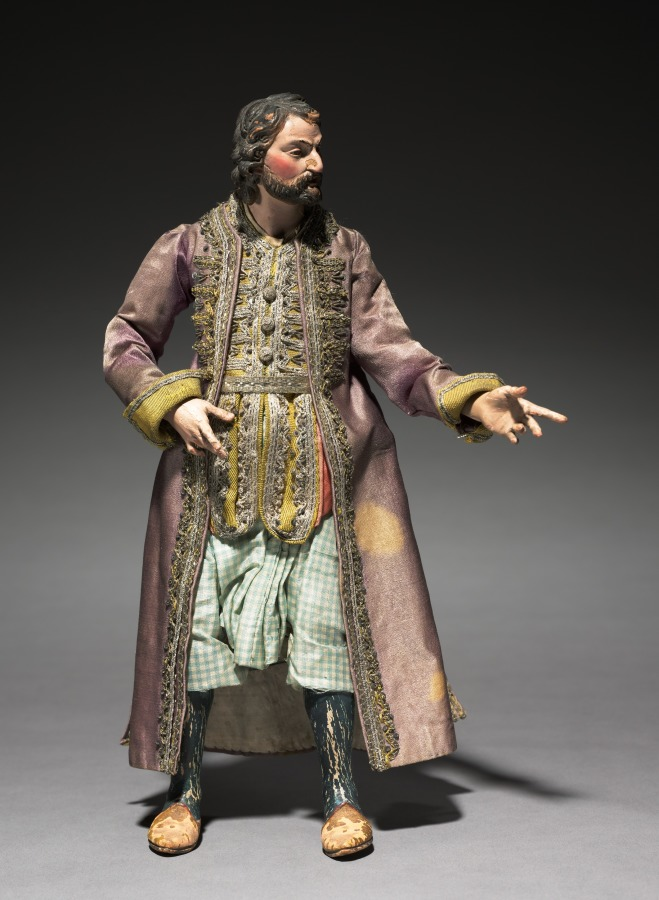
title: Figure from a Crèche: Standing Man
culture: Italy, Naples, late 18th-early 19th century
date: 1780–1830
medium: painted wood and terracotta with various textiles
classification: Sculpture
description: The practice of creating scenes of the Nativity for the home dates from the early 1700s in Italy, where people began to set up doll-like figures of about a foot or less in height. The custom was particularly popular in Naples around 1800, where crèche scenes (crèche means cradle, or crib) included many figures, whose heads and hands of painted terracotta, stuffed cloth bodies, and clothing adapted from contemporary local costumes gave them an amazingly realistic character. Representations of the birth of Jesus can be traced to the first few centuries of Christianity. Both living creatures and sculptural depictions of them were used from early times. By the late middle ages it was customary to create life-size figures of wood or stone, naturalistically painted, to represent the characters who participated in the events of Jesus's early life. These sculptures were then arranged in scenes illustrating one or both of the most important of these events, the Adoration of the Shepherds and the Adoration of the Magi—the three kings from the East who came to pay homage to the Christ child. Used in churches, these large figures were especially popular in Italy, Central Europe, Spain, and Portugal.